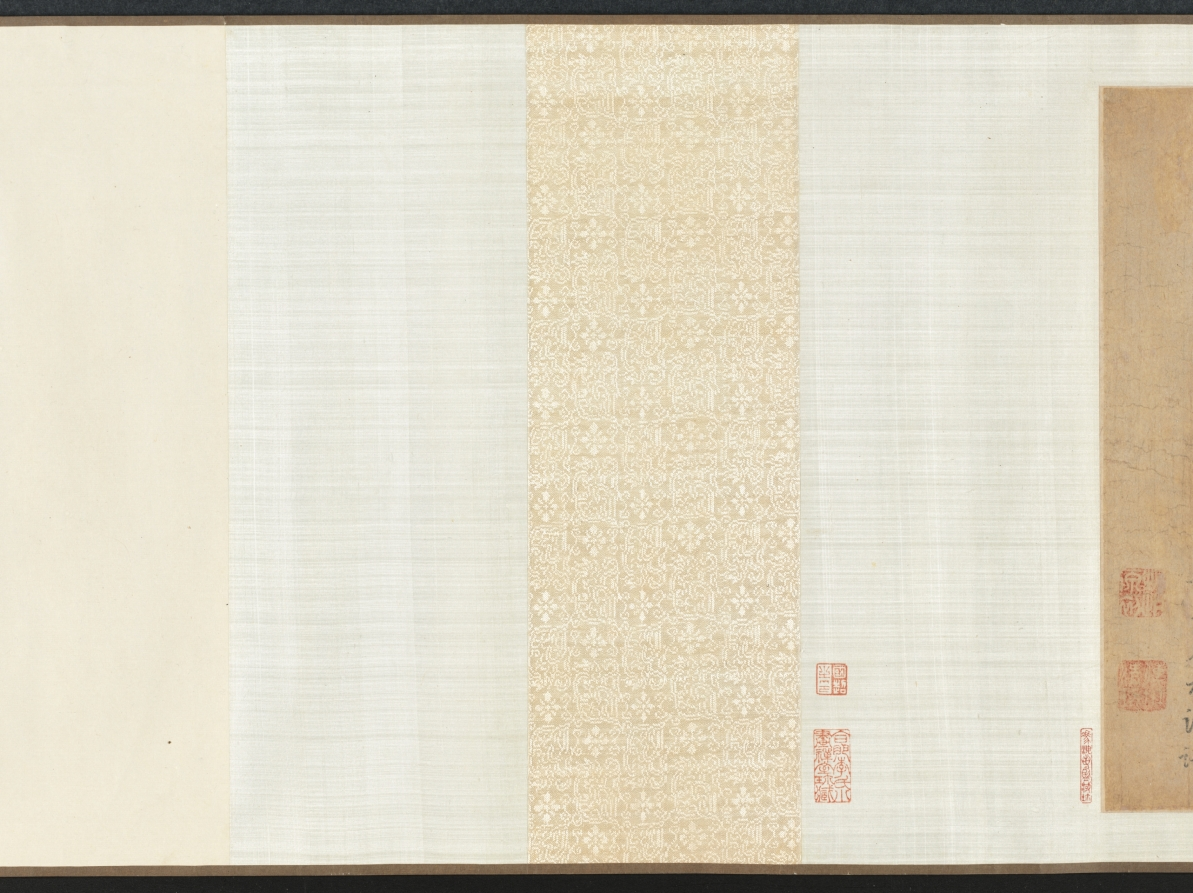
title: Ink Flowers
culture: China, Yuan dynasty (1271-1368)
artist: Zhao Zhong (Chinese, second half of the 1300s)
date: 1361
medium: Handscroll; ink on paper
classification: Painting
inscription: 寶帶同心結，香羅合歡扇。/ 繡作錦鴛鴦，雙雙為君獻。/ 薔薇露灑熏籠衣，馨香奉君君勿違。 原初并題。 [印] 趙衷原初畫記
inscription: 翠袂素羅韈，玉臺黃金盃。浩歌渡弱水。天風卷海三山開，麻姑方平為招飲，蛟宮獻舞銀濤堆。 原初并題。 [印] 雲林清趣、[印] 趙衷原初畫記。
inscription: 右用湯叔雅慶元中所寫墨花法作此卷，又效李長吉體賦詩以題之。詩與畫雖未工，要皆出於古人之餘，譬猶欲成方圓而必求其規矩之用也，識者毋誚焉！至正辛丑八月望日，東吳野人趙衷原初謹識。 [印] 趙原初、[印] 傳世清玩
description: Zhao Zhong's flowers, each paired with a poem, echo the fine-style colored flowers of the academic tradition, but instead he used only ink. Fine lines define the contours of each plant, as well as the veins within each petal and leaf. Careful ink washes give subtle modeling to the forms. The combination of lily, narcissus, and peony is unusual as the three belong to no known seasonal or symbolic system popular in the fourteenth century. Zhao’s medical training may have influenced the selection. Powdered lilies, for example, were prescribed to dispel grief, while the bark of tree peony roots was used as a treatment for various blood disorders.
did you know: This handscroll is a very rare example of ink flowers in the linear baimiao style of the fourteenth century.